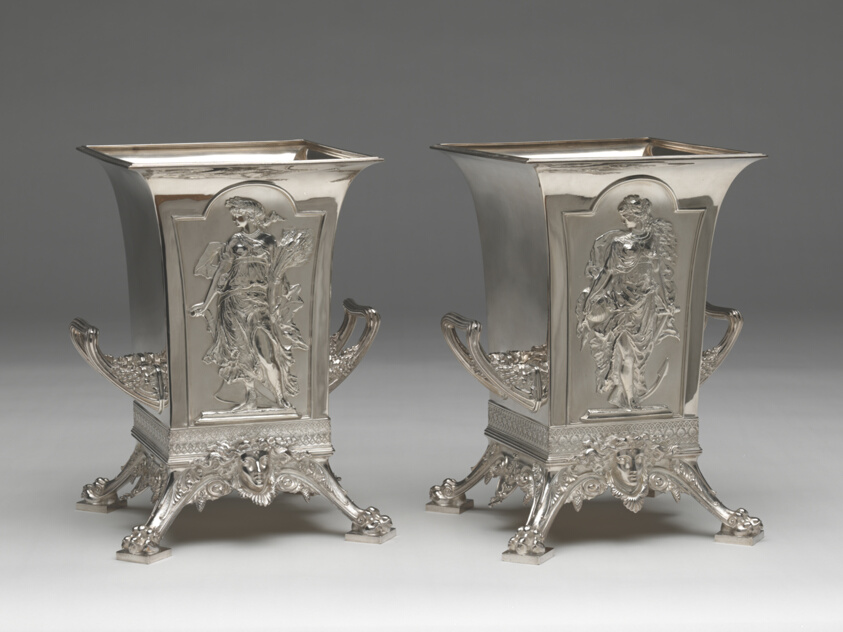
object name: Metalwork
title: Pair of Wine Coolers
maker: Chased by Eugene J. Soligny (American, c. 1833–1901); Tiffany and Company (American, founded 1837); New York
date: 1873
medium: Silver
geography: New York City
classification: container; silver; american decorative arts; american arts; decorative arts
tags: dining, drinking